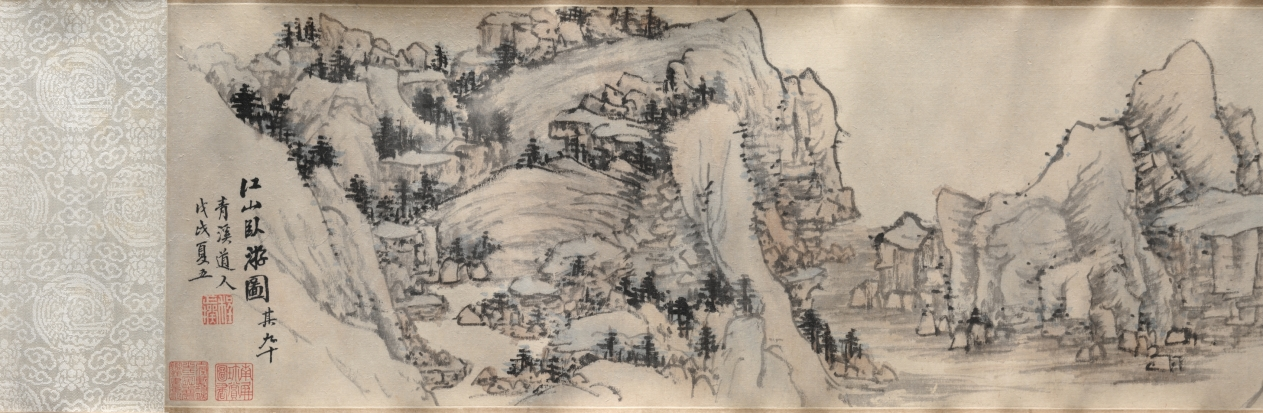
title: Dream Journey among Rivers and Mountains, no. 90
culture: China, Qing dynasty (1644-1911)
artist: Cheng Zhengkui (Chinese, 1604–1676)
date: 1658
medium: Handscroll; ink and color on paper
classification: Painting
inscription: 江山臥遊圖其九十, 青溪道人, 戊戌夏五。 [印] 程正揆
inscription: Title and inscription by Huang Yi 黃易 (1744–1802), and 3 seals.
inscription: 1 colophon and 9 additional seals: 3 seals of Dai Zhi 戴植 (active about 1821–1850); 1 colophon, dated 1914, and 3 seals of Yan Shiqing 顏世清 (1873–1929); 3 seals of Wang Nanping 王南屏 (1924–1985).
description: Cliffs and waterfalls interspersed with trees and dotted vegetation are spread over this handscroll. Long paths wind their way through villages, beside cottages, shrines, and over bridges. In the past, Chinese literati officials liked to take a “dream journey” along mountains and rivers when viewing landscape paintings in their studios. Scenery of this kind thus became a way to escape from the world of bureaucracy and administration. The painter Cheng Zhengkui used the title “Dream Journey” for a whole series of paintings, of which this is number 90. He is said to have painted 500 of them, but the actual count remains unknown.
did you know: Cheng Zhengkui planned to make 100 dream journey paintings but may have ultimately made 500.